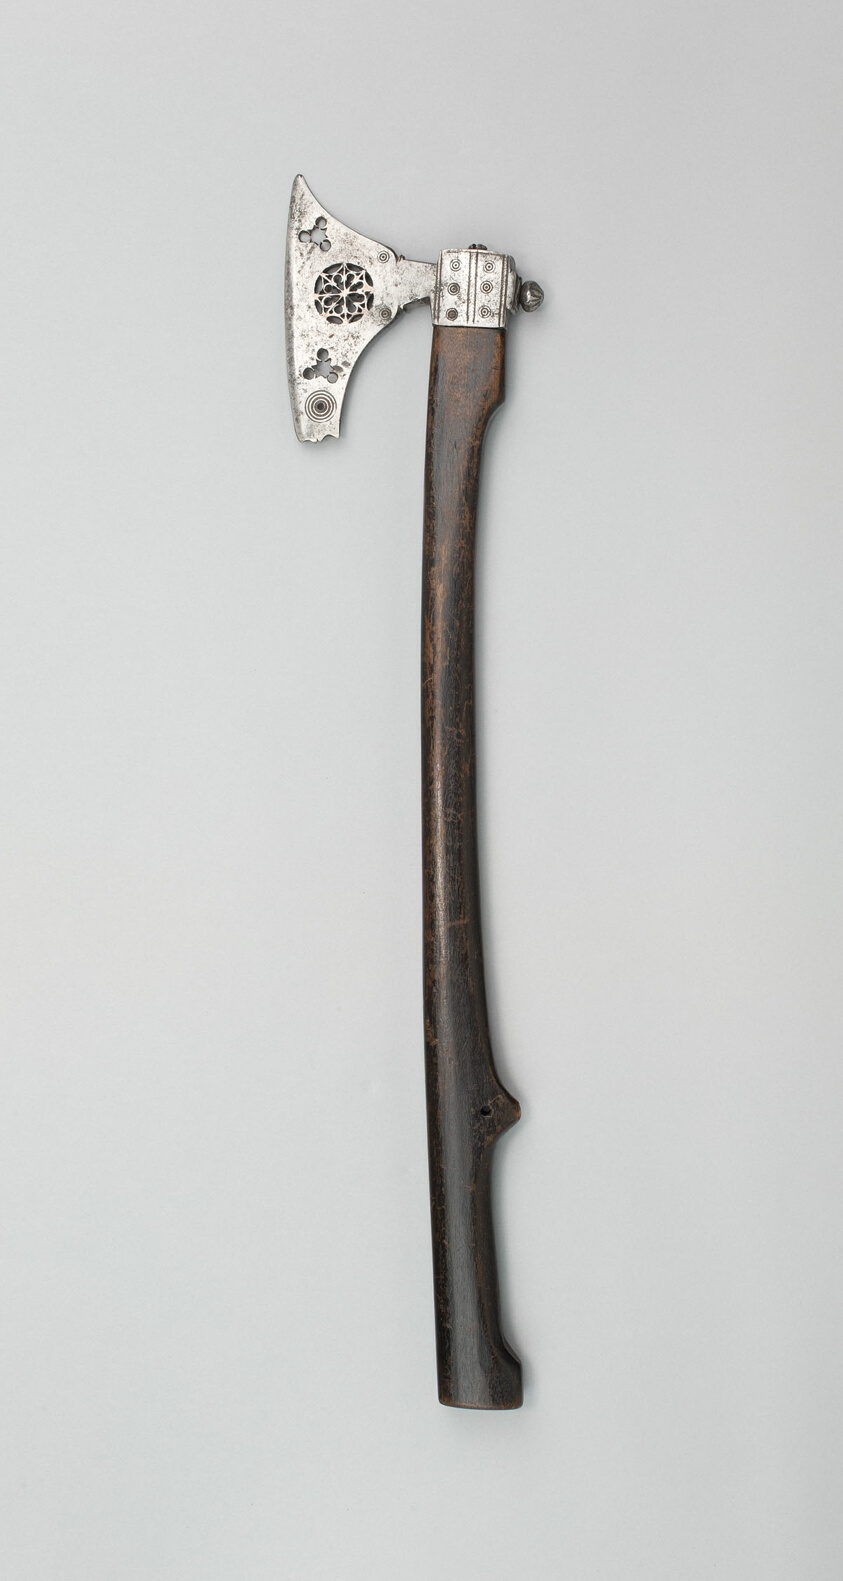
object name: Arms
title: Axe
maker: Italian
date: c. 1490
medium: Steel and wood (ash)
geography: Italy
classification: edged weapon-staff; arms; arms and armor